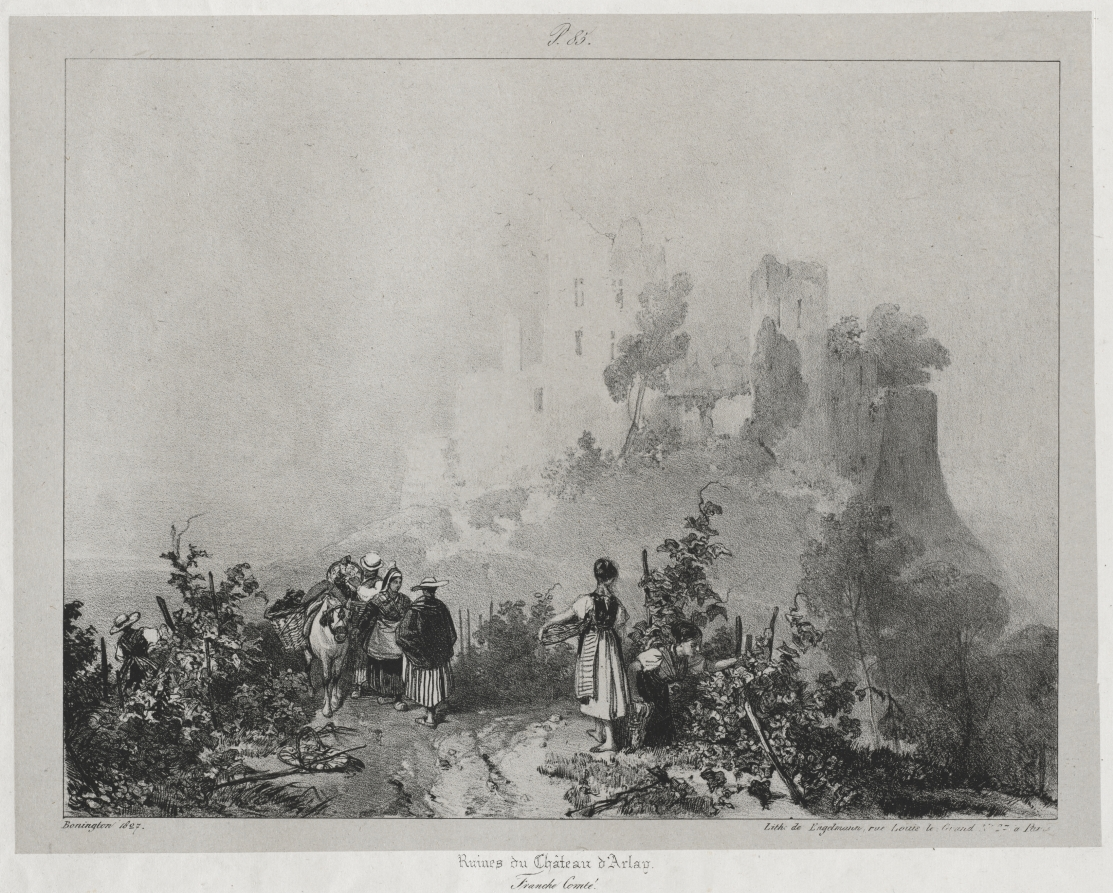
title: Voyages pittoresques et romantiques dans l'ancienne France, Franche-Comté: Ruines du château d'Arlay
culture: England, 19th century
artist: Richard Parkes Bonington (British, 1802–1828)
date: 1825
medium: lithograph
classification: Print